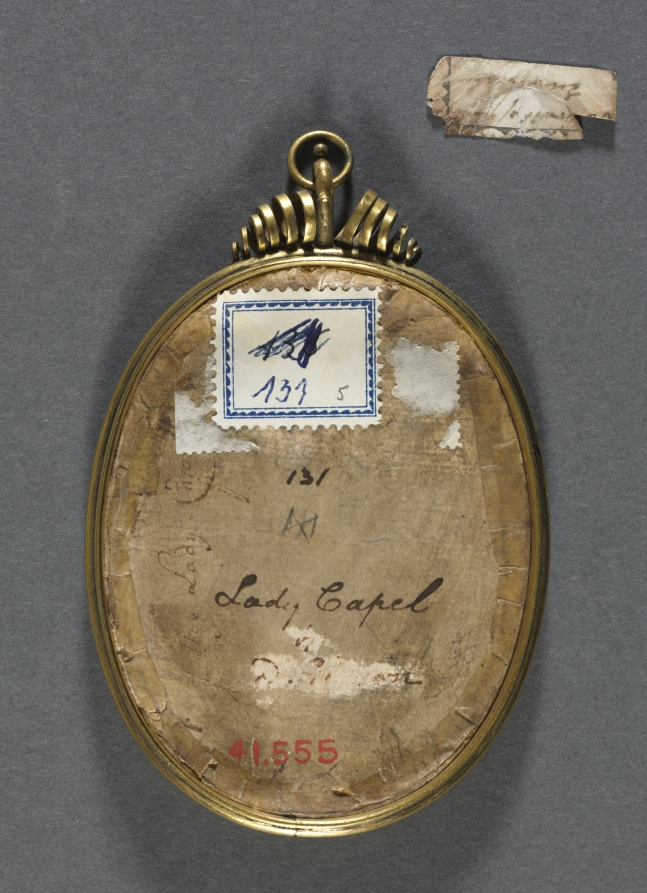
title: Portrait of Elizabeth Morrison, Lady Capell of Hadham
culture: England, 17th century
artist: Richard Gibson (British, c. 1615–1690)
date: c. 1650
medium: watercolor on vellum in a silver gilt frame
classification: Portrait Miniature